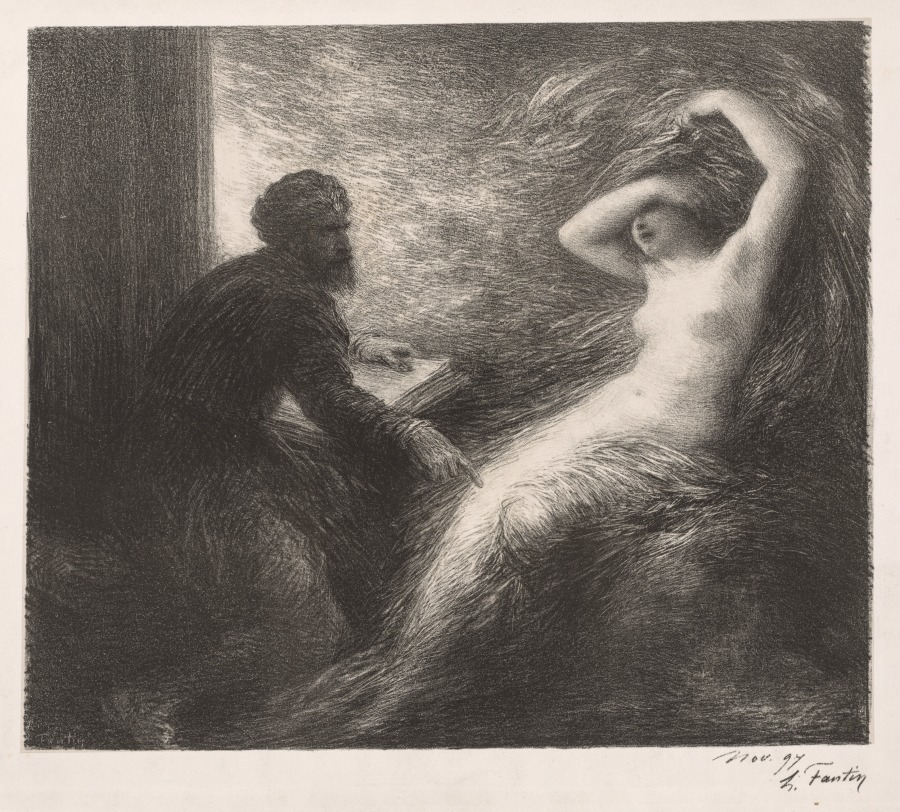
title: The Evocation of Kundry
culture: France, 19th century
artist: Henri Fantin-Latour (French, 1836–1904)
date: 1898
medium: lithograph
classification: Print